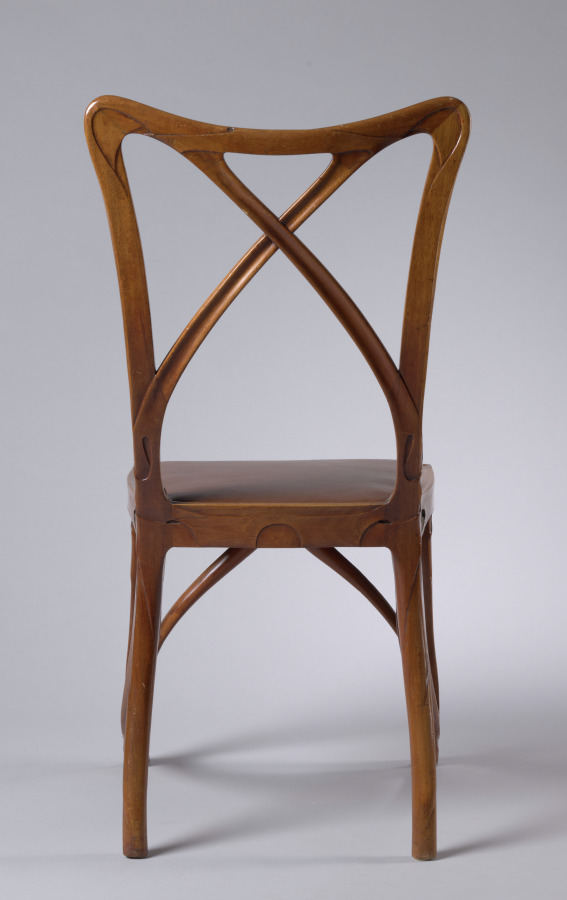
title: Side Chair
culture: France, Paris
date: c. 1900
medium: mahogany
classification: Furniture and woodwork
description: During the 1890s a new style emerged that reflected naturalistic and symbolic motifs found in Japanese and other Asian design. This movement rejected the historicism that had dominated architecture and design during the previous decades and took hold across Europe and America too. In France the style was known as "Art Nouveau," after the name of the gallery belonging to its chief proponent Siegfried Bing, the Maison de L'Art Nouveau (House of the New Art). This side chair typifies Art Nouveau style with its curving lines that seamlessly flow from one to another. This abstract use of curvilinear lines to create form and decoration was one of the major motifs favored by art nouveau designers to evoke naturalistic or organic design. Art Nouveau reached its apex at the 1900 world's fair in Paris, which was intended to herald the new century with a new style of art. However, critics and consumers alike soon rejected Art Nouveau as too sentimental in favor of newer motifs and styles as the moment passed. By 1905 it was all but forgotten.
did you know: This chair may have been designed by Parisian cabinetmaker Eugène Gaillard, who created a very similar design for the pavilion of Siegfried Bing at the 1900 world's fair in Paris.